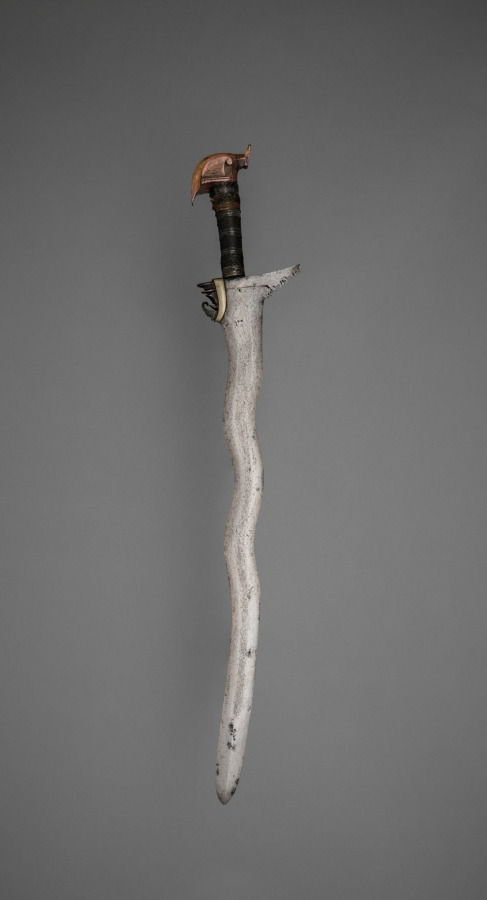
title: Sword (Kris)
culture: Philippines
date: before 1918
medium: Blade: metal; handle: metal with silver and braided twine; pommel: ivory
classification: Arms and Armor